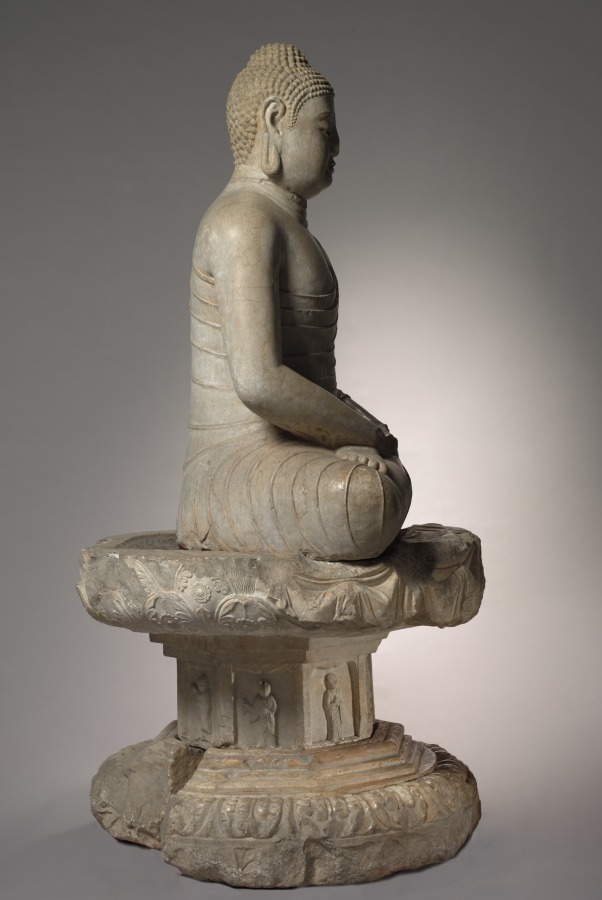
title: Seated Amitayus Buddha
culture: China, Northern Qi dynasty (550-577)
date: c. 570s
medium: marble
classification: Sculpture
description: Amitayus, the Buddha of Infinite Life, is seated in meditation on a double lotus pedestal. The pedestal was not made with the statue but the combination is faithful to the original artistic conception. The statue is an extremely rare example of a major type of Northern Qi Buddhist sculpture. The heavy, massive front highlights the sense of monumentality and the spiritual essence of the Buddha. Today the sculpture is united with a pedestal that exhibits the rich, ornate style of early Tang sculpture. It was commissioned by the Duke of Liang, Fang Xuanling (578–648), for the blessing of his second son and daughter-in-law, the Tang imperial princess of Gaoyang. The iconography and inscription suggest that it originally went with a statue, now missing, of Shakyamuni, the historical Buddha, instead of Amitayus.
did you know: The stringlike folds of the Buddha's draperies emphasize his monumental, rigidly erect torso and tubular limbs.